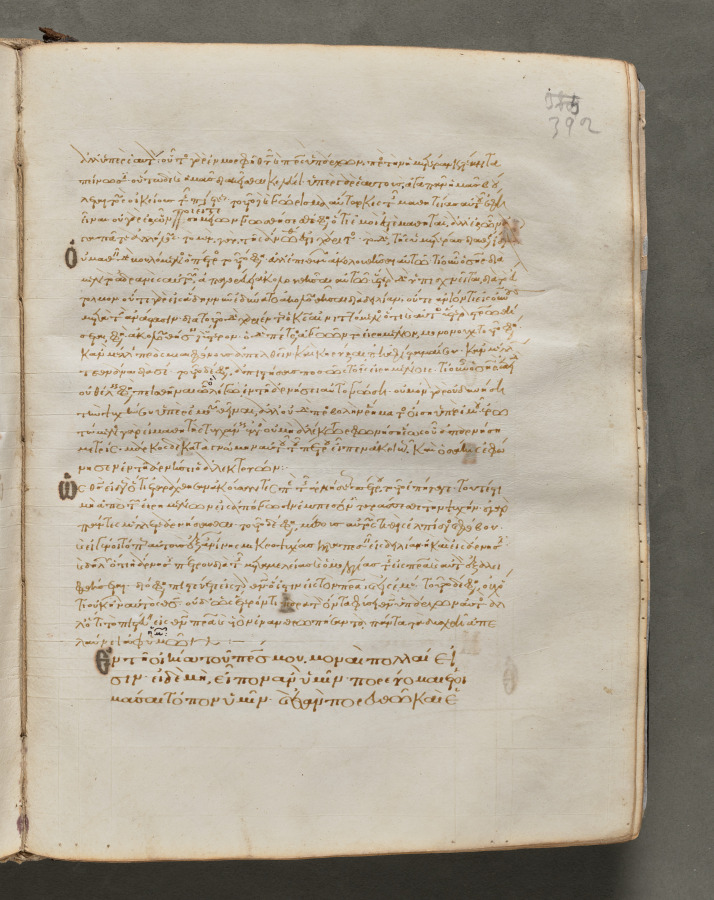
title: Text, folio 392 (recto), from a Gospel Book with Commentaries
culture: Byzantium, Constantinople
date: c. 1000–1100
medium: ink, tempera, and gold on vellum; leather binding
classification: Bound Volume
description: Each of the four gospels in this book opens on a page with brilliantly illuminated borders depicting the author of the text as well as birds—principally peacocks, symbols of the immortality of the soul—and fountains, representing the fountain of life and the salvation of the soul. This volume consists of 428 leaves with texts in Greek. Its level of sophistication suggests that it was probably written and decorated in a monastery in Constantinople.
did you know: Gospel books were carried in procession through Byzantine churches.